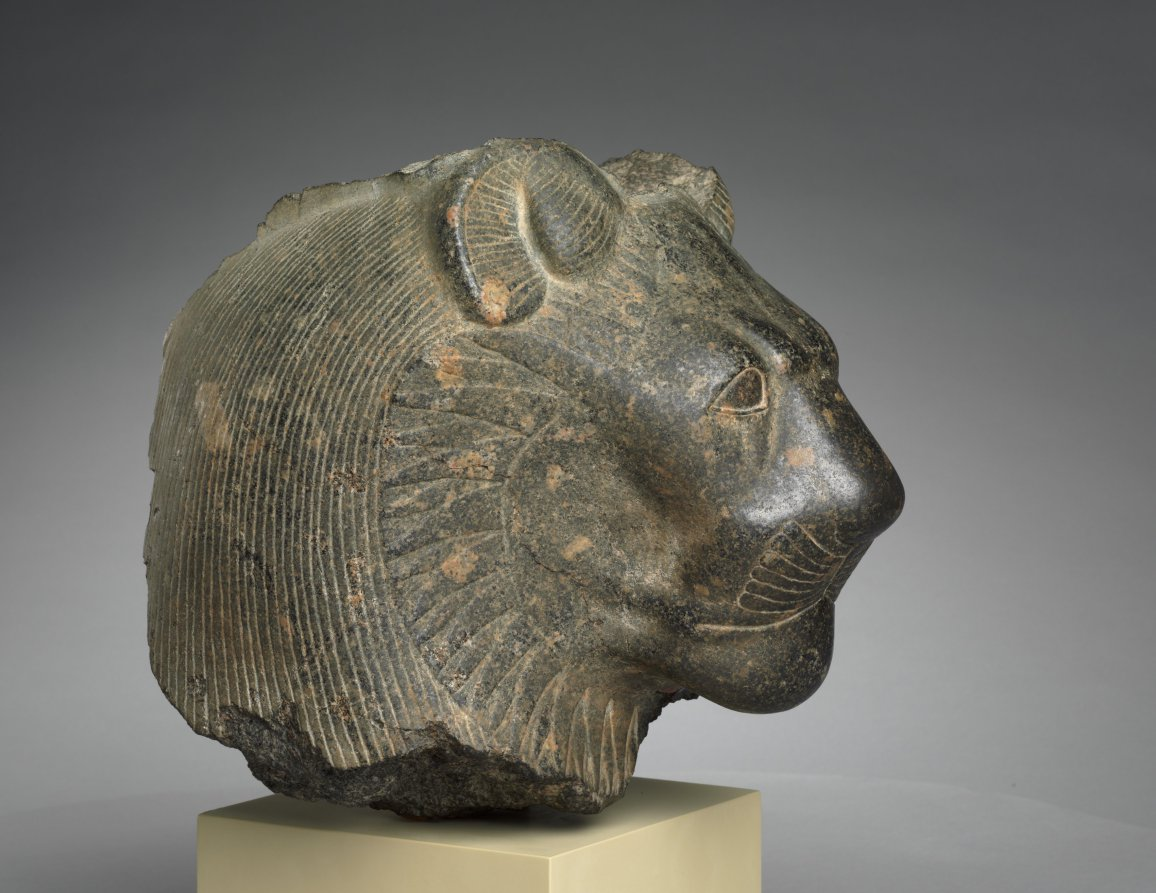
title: Head of Sekhmet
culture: Egypt, Thebes(?), New Kingdom (1540–1069 BCE), Dynasty 18, reign of Amenhotep III (1390–1352 BCE)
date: c. 1391–1353 BCE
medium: granodiorite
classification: Sculpture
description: This lioness head once belonged to a grand statue of the goddess Sekhmet, "the powerful one," probably seated and wearing a tight dress. Possibly appealing to her healing aspect, Pharaoh Amenhotep III, often described as “beloved of Sekhmet,” commissioned and dedicated hundreds of large granodiorite Sekhmet sculptures in his Theban mortuary temple. Thus, this head likely comes from Thebes, perhaps later moved across the Nile—like many such sculptures—to the temple of Mut, a related deity, at Karnak. Behind her stylized ruff, Sekhmet wears a wig, once crowned with a sun disk and uraeus, the stylized cobra symbolizing royal or divine power.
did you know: Amenhotep III may have dedicated 730 statues of Sekhmet, two for each day of the year.